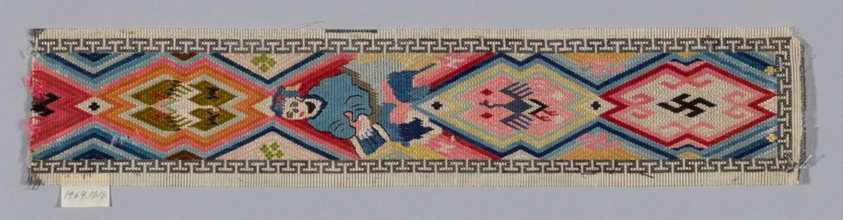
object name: Costume and Accessories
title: Trouser Band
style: qing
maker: Han-Chinese (China)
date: Qing dynasty (1644–1911), 1875/1900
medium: Each having one figure, also birds designs, black and white border, embroidered on gauze.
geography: China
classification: costume - embroidery; needlework (visual works); weaving; costume